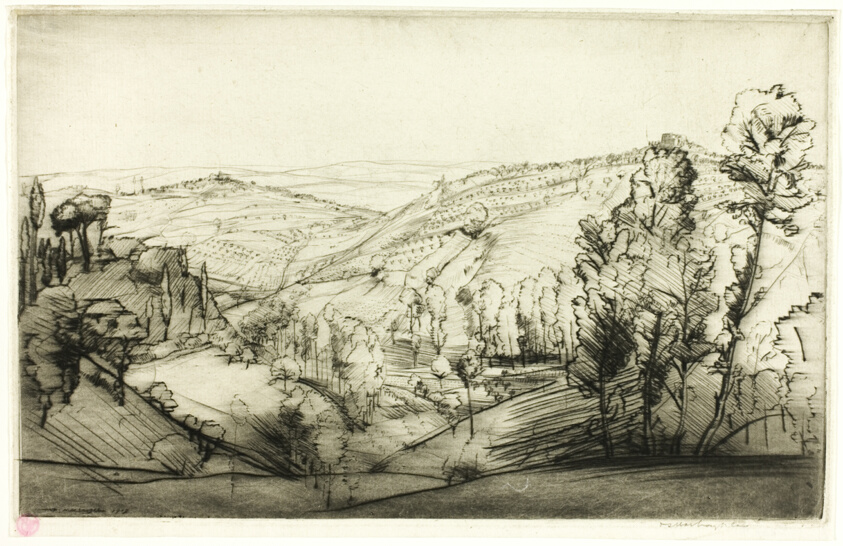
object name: Print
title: Fields of San Gimignano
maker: Donald Shaw MacLaughlan (American, born Canada, 1876-1938)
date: 1909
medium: Etching and drypoint in black on ivory laid paper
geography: United States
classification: drypoint; print; prints and drawing